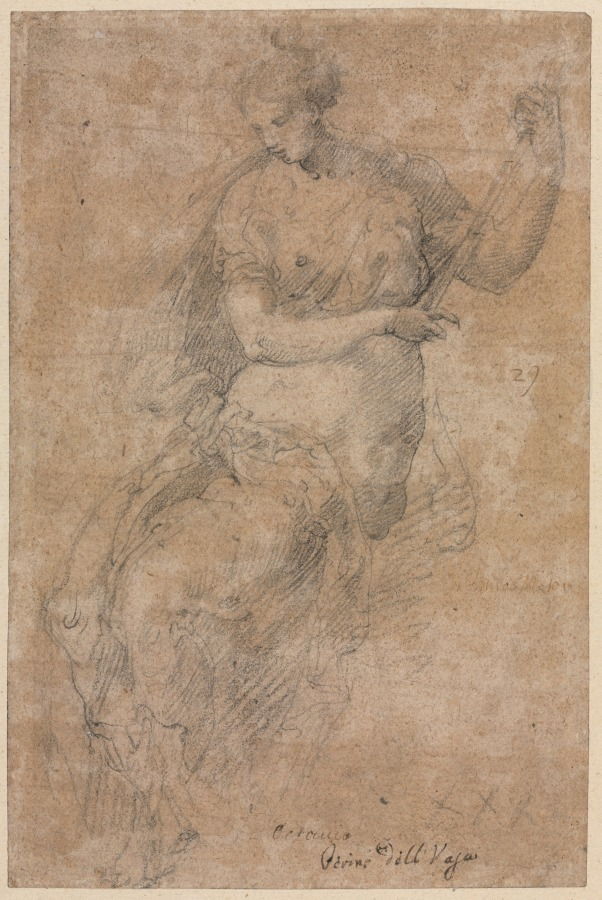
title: Allegorical Figure (recto and verso)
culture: Italy, 16th century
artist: Niccolo dell' Abbate (Italian, c. 1512–1571)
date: 16th century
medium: black chalk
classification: Drawing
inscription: by artist?, lower right, in black chalk: XXX ; center right, in brown ink: 29 ; center right, in brown ink: [O.?] Fama M[a?]jo[r?] 101. ; lower center, in brown ink: Octavio ; lower center, in brown ink: Perino dell' Vaga